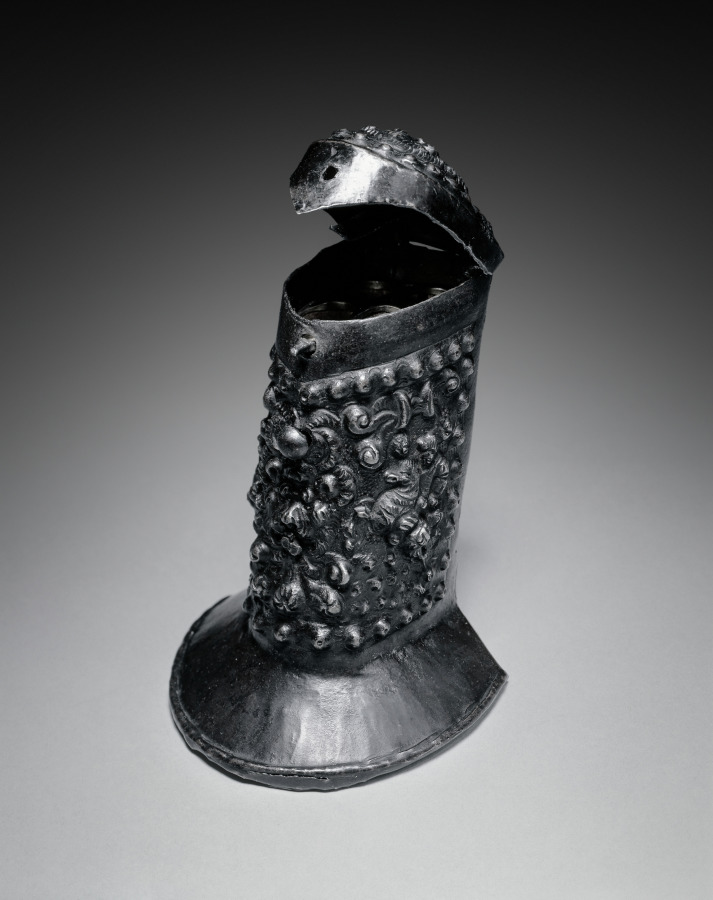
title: Patron (Cartridge Box)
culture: Germany, early 17th Century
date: c. 1600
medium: steel sheet, over wood, brass; leather base; embossed decorations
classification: Arms and Armor